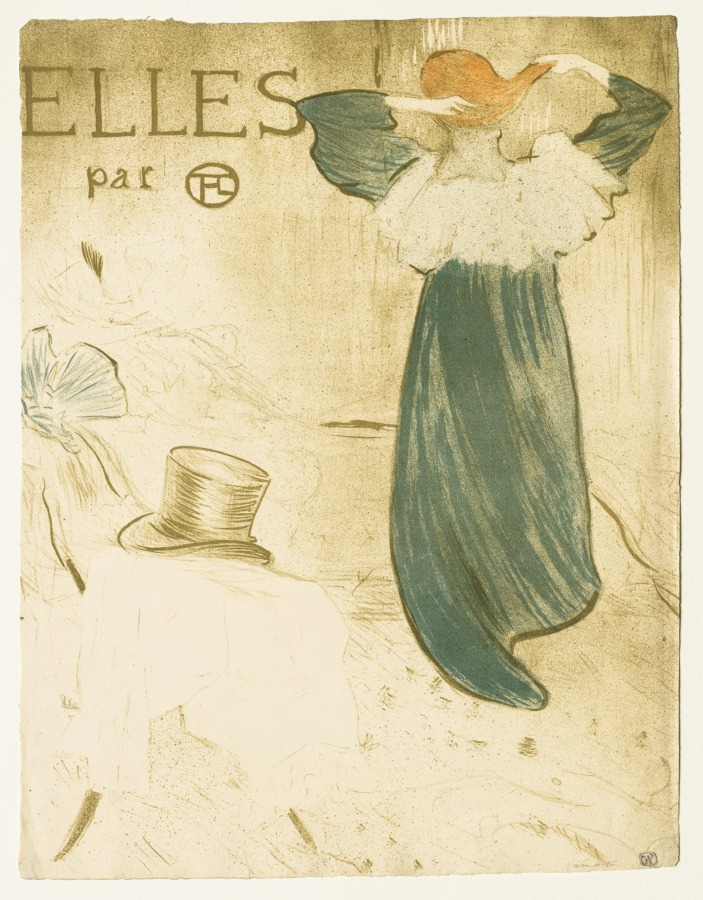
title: Elles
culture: France, 19th century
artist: Henri de Toulouse-Lautrec (French, 1864–1901)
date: 1896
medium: color lithograph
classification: Print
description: The French publisher Gustave Pellet, hoping to attract new customers, persuaded Lautrec to make a series of ten prints, plus frontispiece and cover, depicting brothels. Although it was not unusual to see prostitutes pictured in the popular press, Lautrec was the first well-known, successful artist to tackle this subject. The set was a commercial failure when it first appeared, perhaps because the scenes are not erotic. Lautrec had said that "they are women to my liking," and between 1892 and 1895 he often lived in various Parisian brothels for weeks at a time. This allowed him to witness the daily lives of the women, including the intimate acts of sleeping and bathing, and to sense their suffering. The result is that only two of the scenes show prostitutes as desirable temptresses. The remainder depict the mundane routine of the women's private world, their caring for each other, their boredom, and, living on the periphery of society, their sense of isolation. Lautrec did not take a direct moral stand. He portrayed the women sympathetically, restoring to them their humanity. One scene shows Juliette Baron, whose life of vice has led to premature aging, bringing her daughter Paulette breakfast. Other images depict the women at private moments, bathing or combing their hair in natural, relaxed poses, unaware of being observed. The beauty of the drawing and use of color makes this set one of the masterpieces of late nineteenth-century French color lithography.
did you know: The top hat seen at left alludes to the presence of a male patron in this frontispiece to Henri de Toulouse-Lautrec's lithographic series about prostitution.